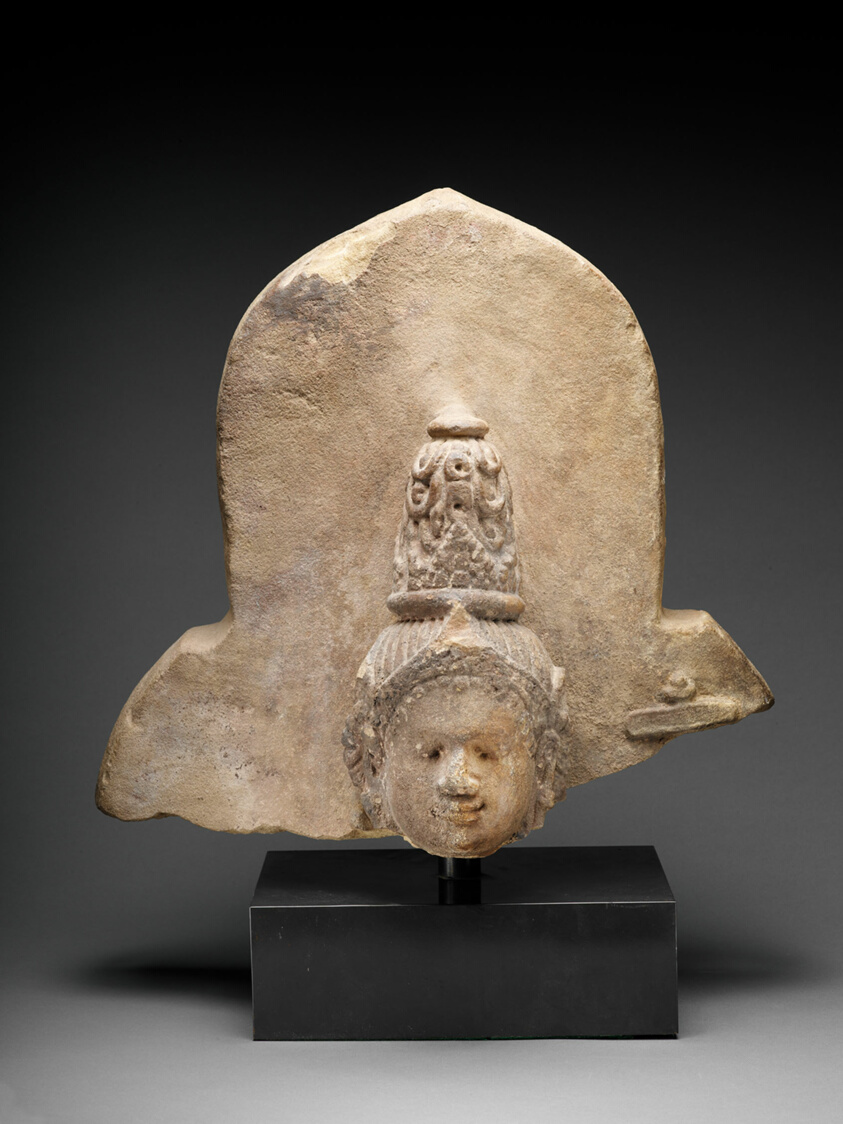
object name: Sculpture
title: Head of a Female Deity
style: Southeast Asian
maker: Indonesia; Borneo, Kutai Province, Gunung Kombeng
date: c. 9th/13th century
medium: Sandstone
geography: Borneo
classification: stone (unidentified); stone; sculpture; asian art